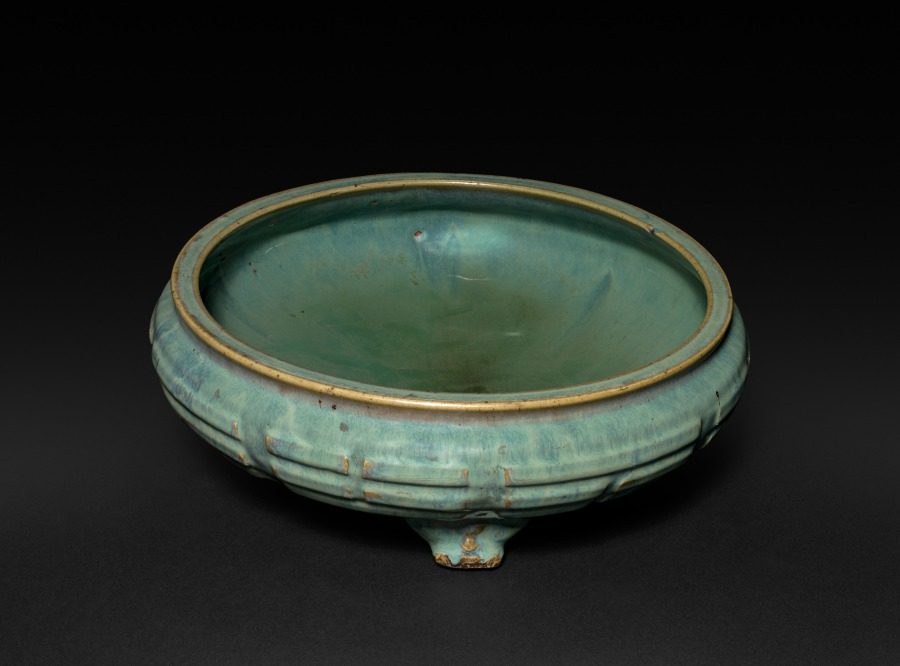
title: Tripod Bulb Dish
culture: China, Ming dynasty (1368–1644)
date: 1368–1644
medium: porcelain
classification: Ceramic